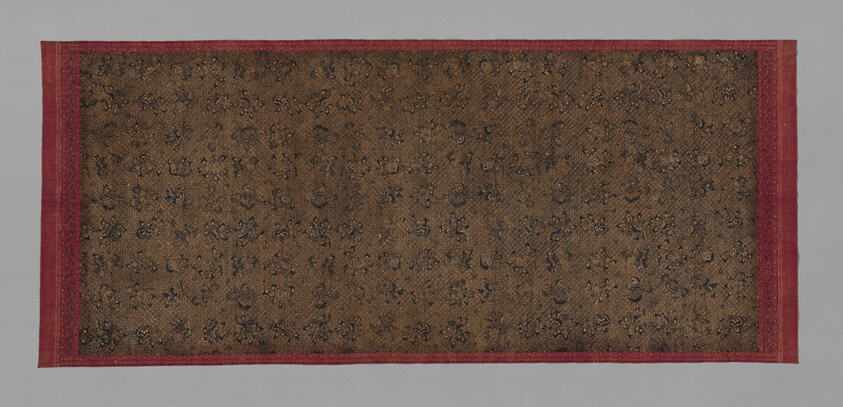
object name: Textile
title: Skirt Cloth (Kain panjang)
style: indonesian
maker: Indonesia, Sumatra, Jambi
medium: Cotton, plain weave; wax resist dyed (batik)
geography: Indonesia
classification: textile; weaving - printed